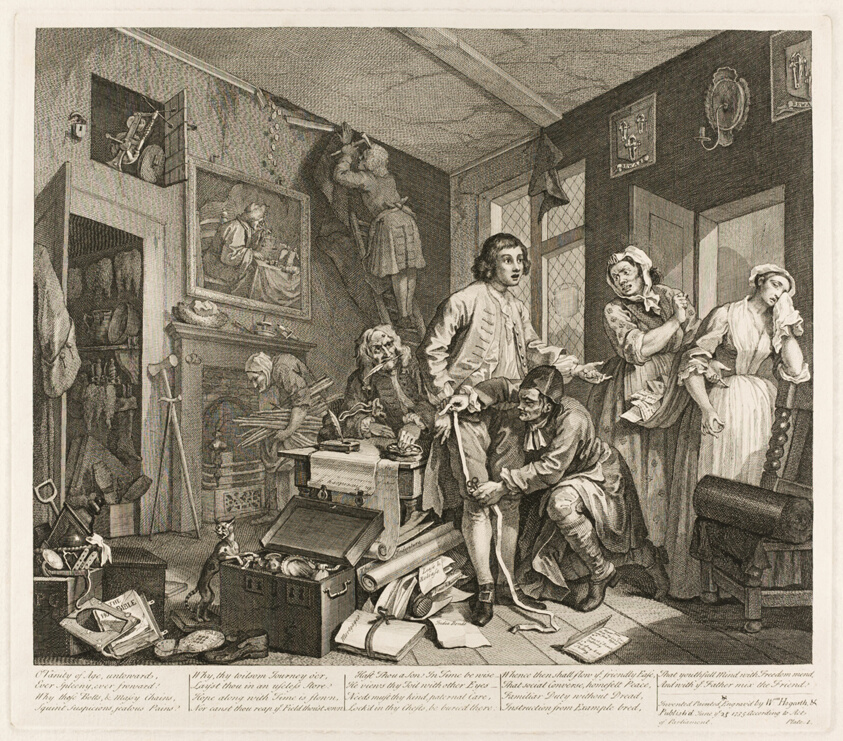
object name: Print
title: Plate One, from A Rake's Progress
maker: William Hogarth (English, 1697-1764)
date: June 1735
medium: Etching and engraving in black on ivory laid paper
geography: England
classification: etching; print; prints and drawing